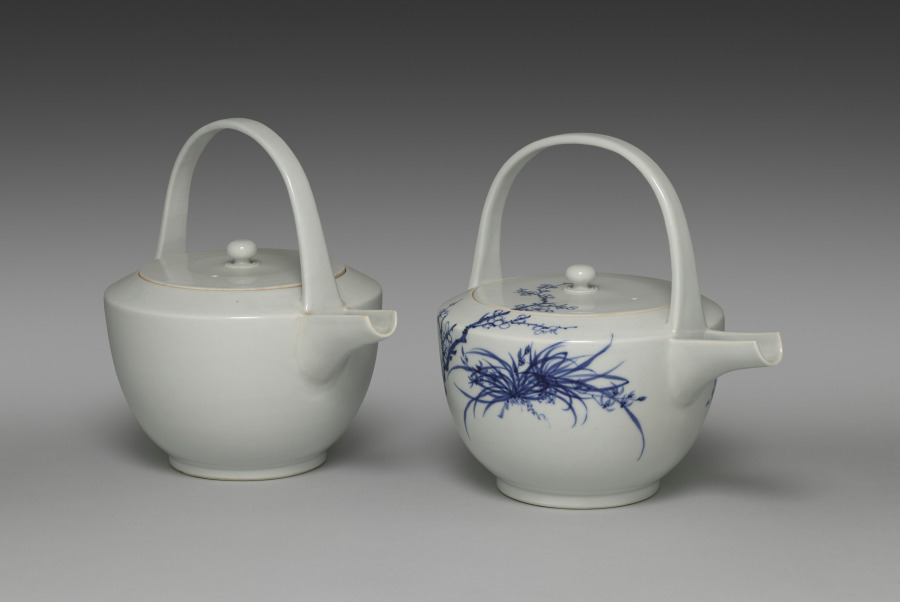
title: Sake Pourer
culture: Japan, Meiji period (1868–1912)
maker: Seifū Yohei III (Japanese, 1851–1914)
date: c. 1887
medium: Porcelain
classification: Ceramic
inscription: Artist's signature in underglaze blue on the base.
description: This sake pourer has a wide basin with a low foot; a generous spout open across the top half; a flat, round lid with a small knob recessed flush to the top of the container; and a tall, arched handle that meets the container where the top joins the basin at a sharp angle. This vessel is glazed but otherwise undecorated. Unlike the creamy white color of some Yohei III works, the white of this sake pourer has the bluish cast typical of porcelains produced in Kyoto.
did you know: Seifū Yohei III signed this sake pourer in underglaze blue on the base.